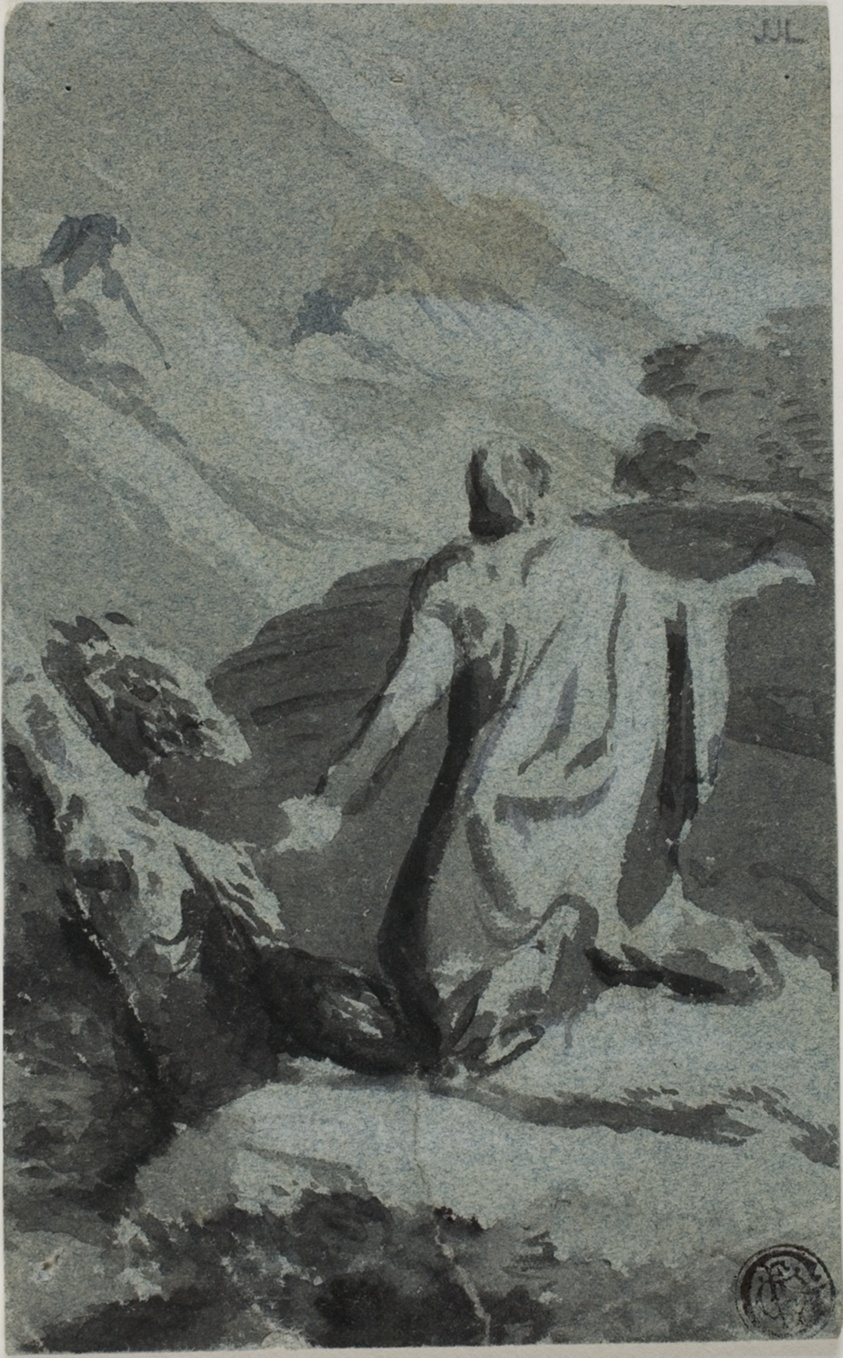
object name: Drawing and Watercolor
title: Man Praying in Wilderness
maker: Nicolas Poussin (French, 1594-1665)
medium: Brush and black ink and gray wash, with touches of brush and blue-gray wash, over traces of black chalk, on blue wove paper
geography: France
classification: brush and ink; brush and wash; paper; drawings (visual works); prints and drawing